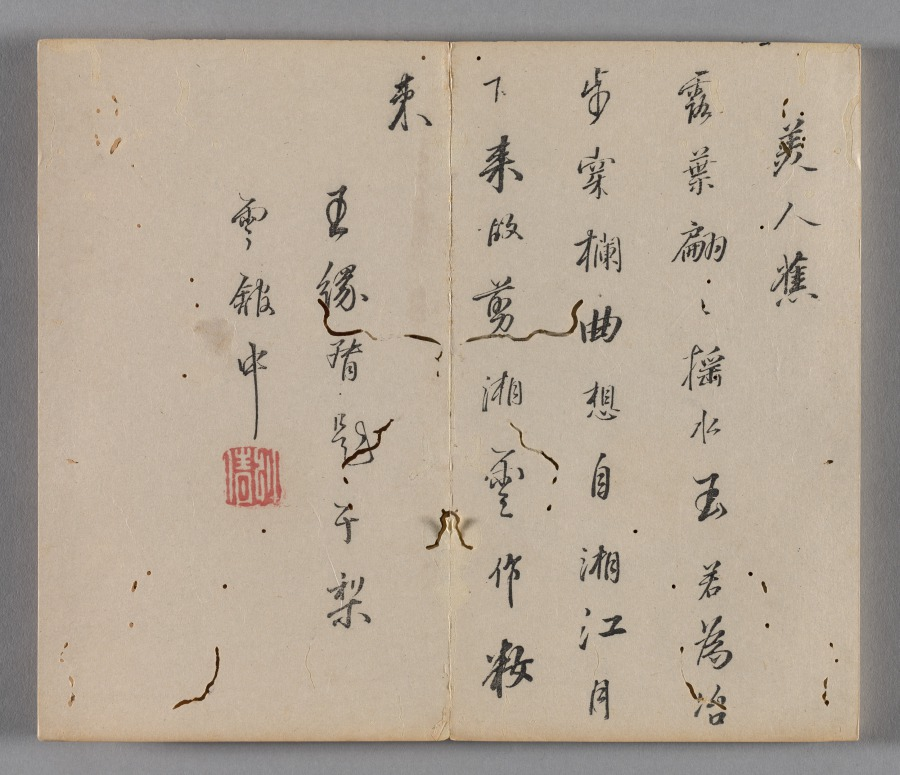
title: Ten Bamboo Studio Painting and Calligraphy Handbook (Shizhuzhai shuhua pu): Miscellaneous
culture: China, Qing dynasty (1644-1911)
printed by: Hu Zhengyan (Chinese, c. 1584–1674)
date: 1633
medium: Woodblock-printed book; ink and colors on paper; first edition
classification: Print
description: Color printing reached a level of perfection in the early 1600s, as seen in this Ten Bamboo Studio Collection of Calligraphy and Painting and the Mustard Seed Garden Manual of Painting (printed 1679 and 1701). The painterly quality, precision in registering (aligning) the woodblocks, and harmonious colors made them the most successful color print editions in Chinese history. Both editions were printed and compiled in Nanjing, spread nationwide, and had a great impact on the arts in Japan and Korea.